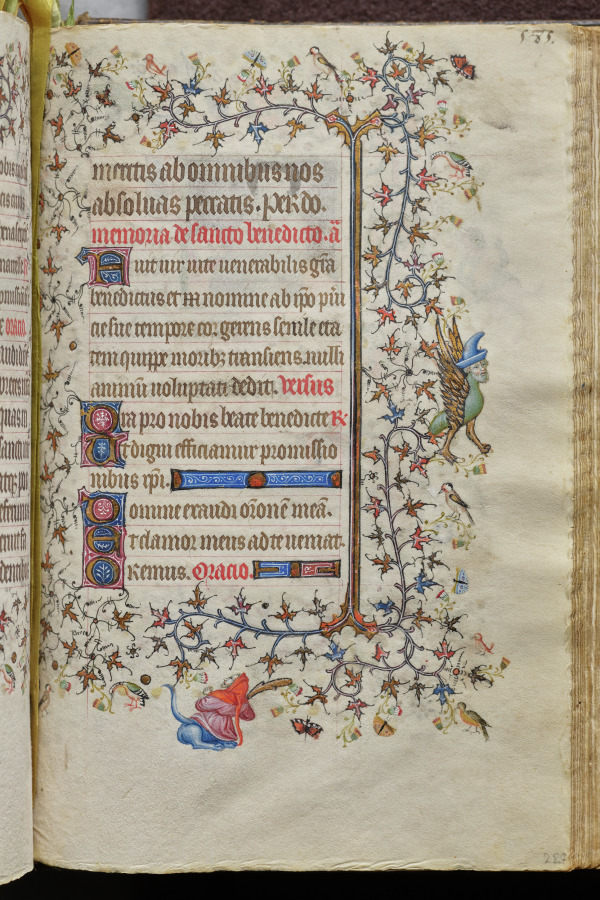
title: Hours of Charles the Noble, King of Navarre (1361-1425): fol. 287r, Text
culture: France, Paris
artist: Master of the Brussels Initials and Associates (French)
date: c. 1405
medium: ink, tempera, and gold on vellum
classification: Bound Volume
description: This precious volume was obviously highly prized by its owner, the French-born King of Navarre, who had his coat of arms painted on no less than twenty folios. Rather than directly commissioning this manuscript from a specific workshop, it seems that Charles the Noble acquired his book of hours -- perhaps ready-made for the luxury market -- while on a trip to Paris in 1404-05. A collaborative effort, six painting styles are evidenced within the pages of this codex, those of two Italians, two Frenchmen, and two Netherlanders. The painter who was responsible for the planning and decoration of the book, and who produced seventeen of the large miniatures, was a Bolognese artist known as the Master of the Brussels Initials. His principal assistant, responsible for most of the borders, was a Florentine who signed his name "Zecho" da Firenze on folio 208 verso.